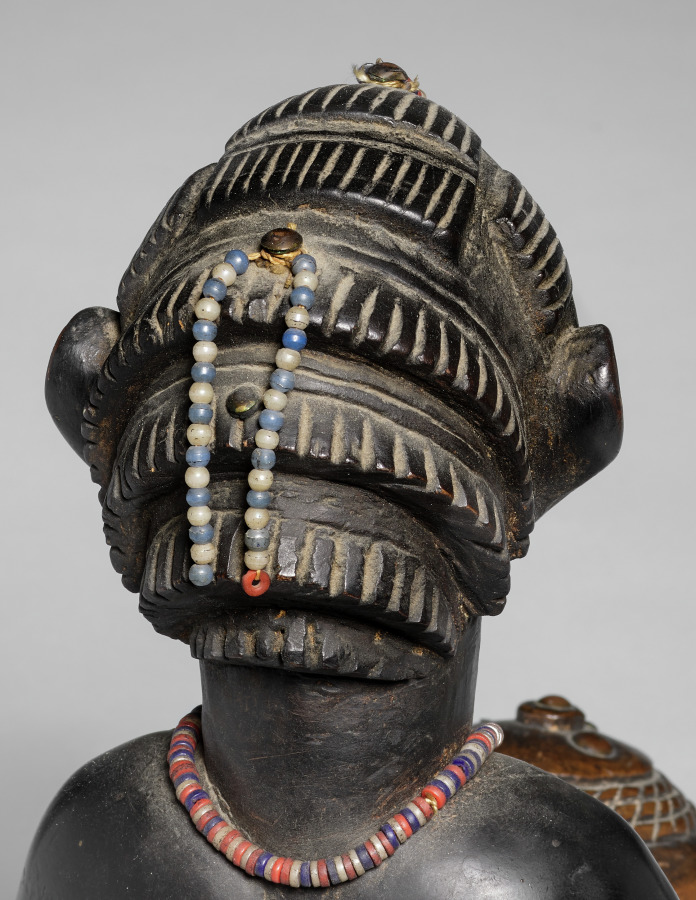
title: Female Bowl-Bearing Figure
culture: Africa, Central Africa, Democratic Republic of Congo, Luba-style carver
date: late 1800s-early 1900s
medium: Wood, glass beads, upholstery studs, plant fiber, and iron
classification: Sculpture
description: In Luba-style art, an object's beauty affects how well it works. While bowl-bearing figures had many possible uses, a royal diviner likely used this well-carved image of a woman carrying a bowl in rituals. Dusty traces of mpemba (white chalk) fleck the shining exterior and the bowl's interior, showing it once held this sacred powder. Diamond-shaped scarification marks at her waist, chest, and back add to her beauty. Her hair is carved into the cascading layered hairstyle worn in the Luba region at the turn of the twentieth century. Strands of imported glass beads encircle her waist and neck, and dangle from her hair. The alternating white and blue beads may symbolize the moon and Mbidi Kiluwe, a culture hero linked to royal practice and smithing. While much Luba-style art depicts women—who are societally important—men created and owned the majority of such works.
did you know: Symbolic of anvils, the round metal tacks decorating the figure's hair "pin" spirits and their secrets within it. They are at the hairline and each of the four hair cascades (the bottommost is now gone).